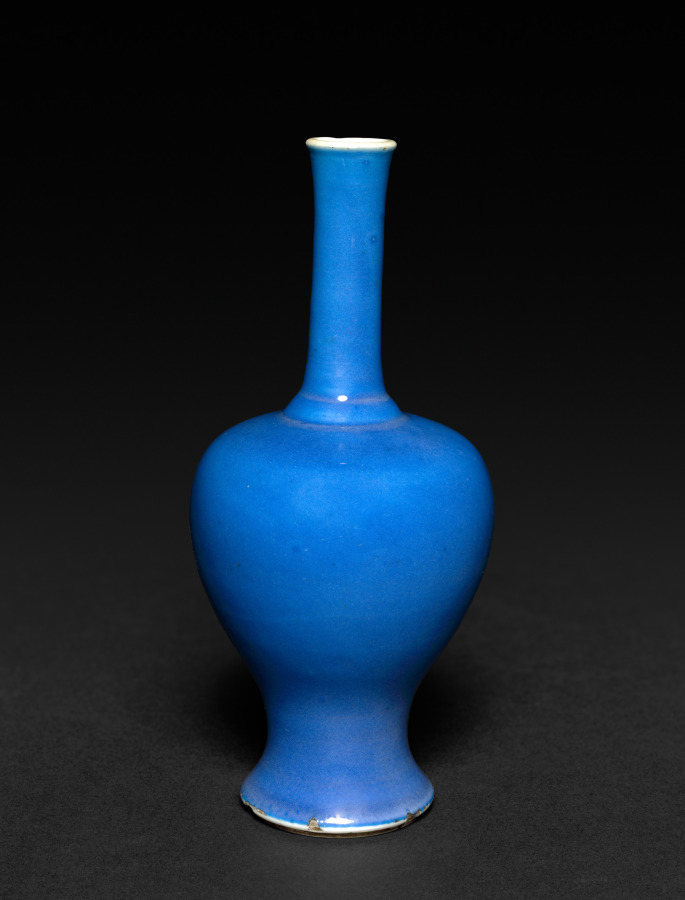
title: Miniature Vase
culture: China, Qing dynasty (1644-1911), Kangxi reign (1662-1722)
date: 1662–1722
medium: porcelain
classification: Ceramic